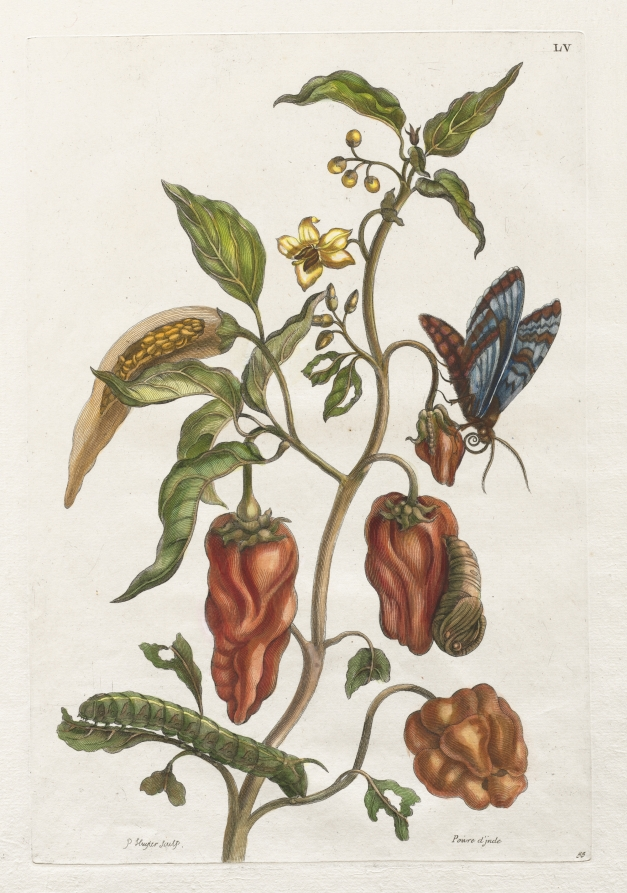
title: Histoire générale des insects de Suriname et de toute l'Europe: Vol I, No. 55 - Poivre d'inde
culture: Switzerland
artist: Maria Sibylla Merian (German, active Netherlands, 1647–1717)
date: 1771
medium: engraving, hand-colored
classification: Print